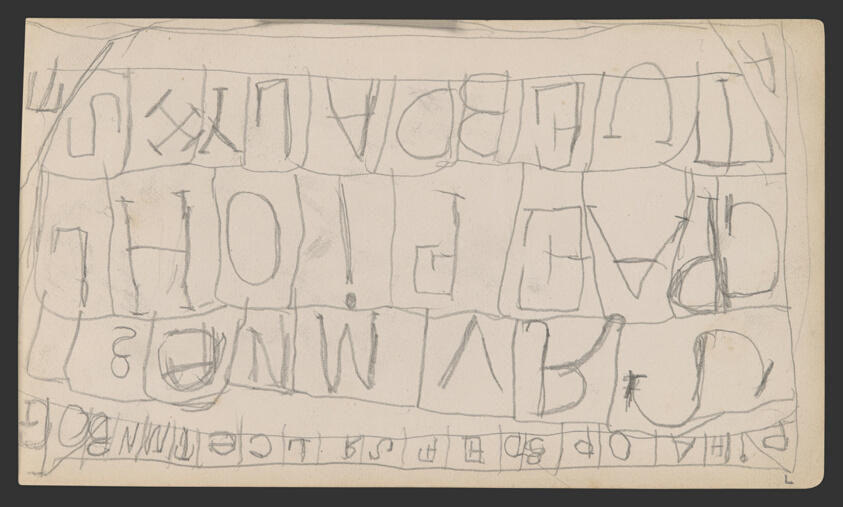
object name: Drawing and Watercolor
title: Sketchbook No. 2 (L'Estaque)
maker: Paul Cézanne; French, 1839-1906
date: 1875–86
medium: Graphite and pen and ink drawings on paper, bound into a book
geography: France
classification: sketchbook; graphite; prints and drawing; paper